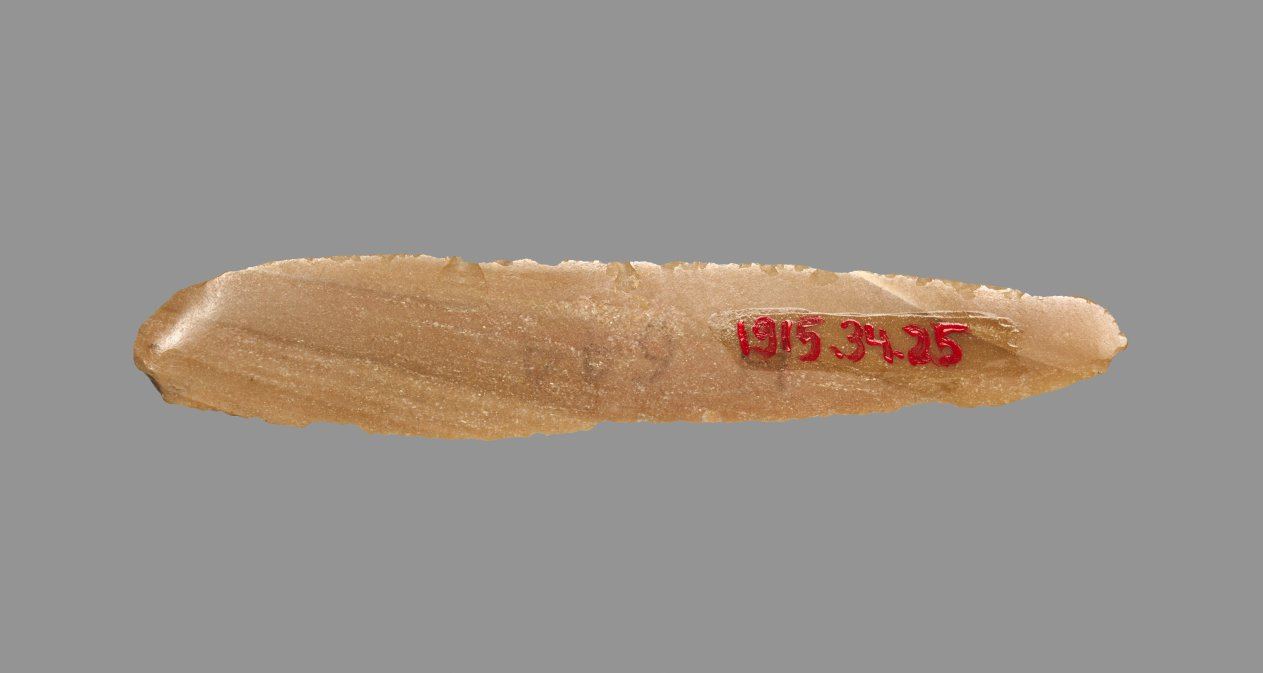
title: Sickle Blade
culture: Egypt, Middle Kingdom (2040–1648 BCE), Dynasty 12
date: 1980–1801 BCE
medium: flint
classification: Implements